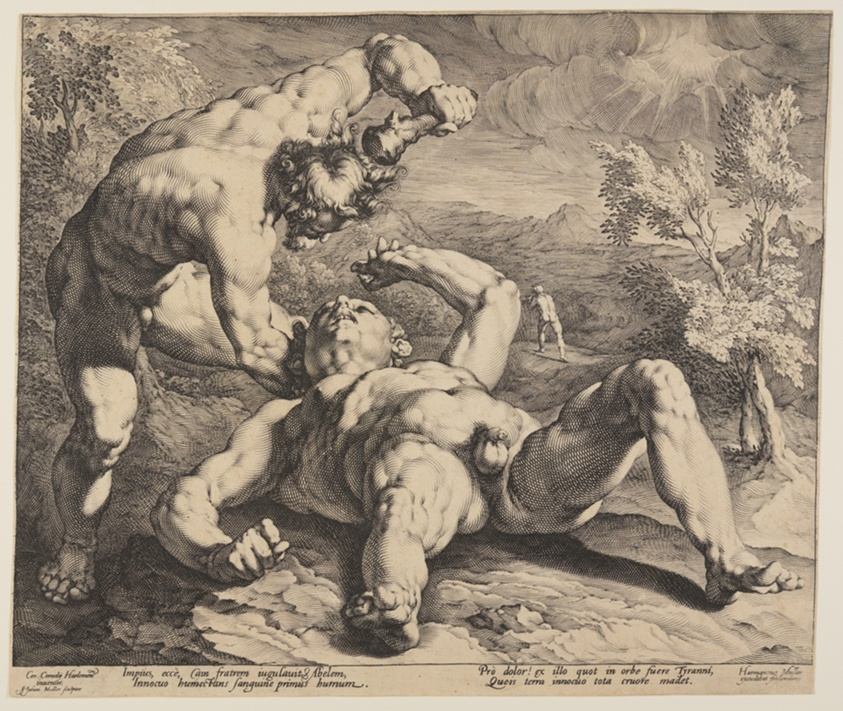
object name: Print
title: Cain Killing Abel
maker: Jan Harmensz Muller (Dutch, 1571–1628); after Cornelis van Haarlem (Dutch, 1562–1638)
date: c. 1589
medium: Engraving on ivory laid paper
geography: Netherlands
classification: engraving; paper; print; prints and drawing